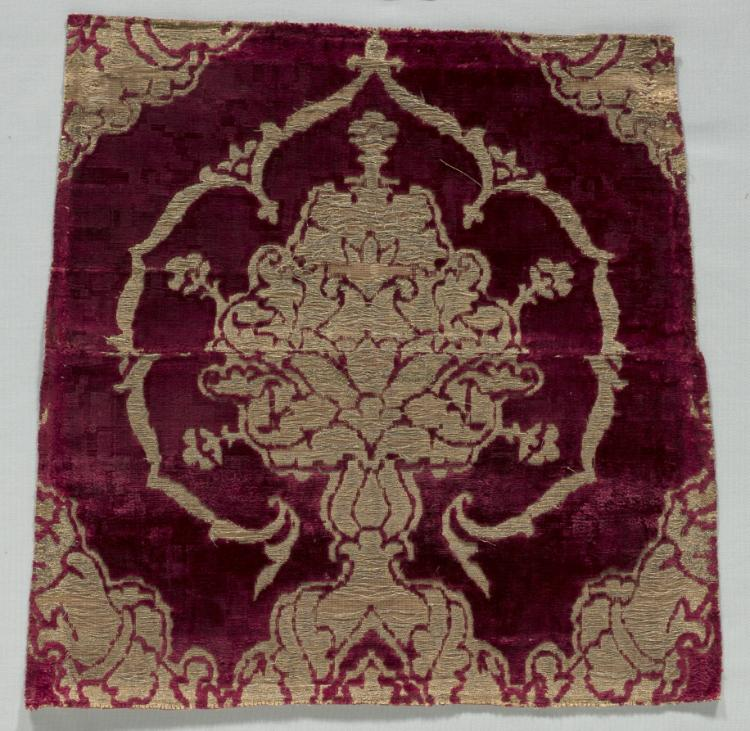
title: Velvet Fragment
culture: Italy, 15th century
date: 1400s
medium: velvet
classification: Velvet